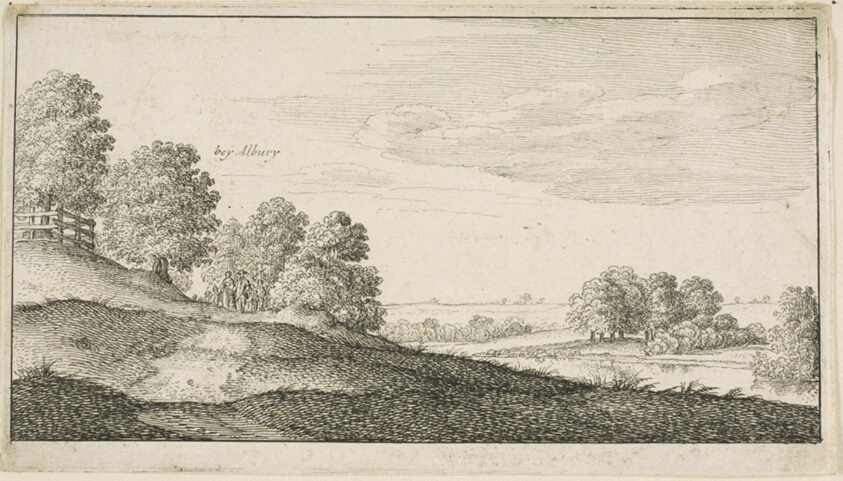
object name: Print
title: Albury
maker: Wenceslaus Hollar (Bohemian, 1607-1677)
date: c. 1645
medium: Etching on ivory laid paper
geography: Bohemia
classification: etching; print; prints and drawing